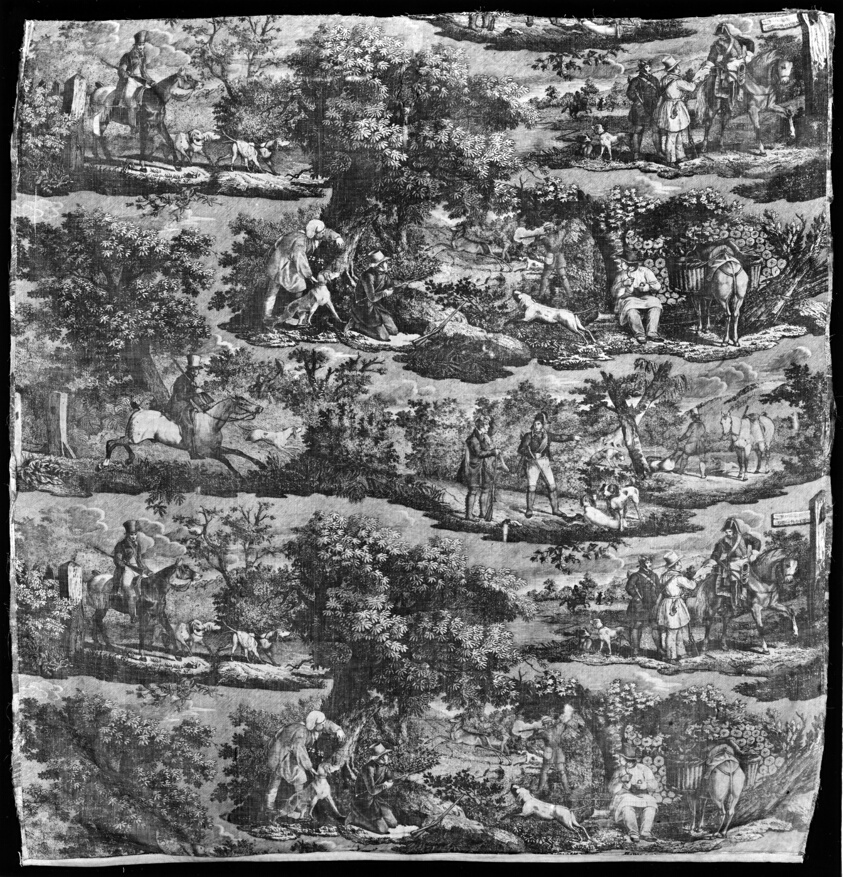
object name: Textile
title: La Chasse à Rouen (Hunting at Rouen) (Furnishing Fabric)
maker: Horace Vernet (French, 1789-1863); France, Rouen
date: 1840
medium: Cotton, plain weave; engraved roller printed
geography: Rouen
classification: textile; weaving - printed; furnishing textile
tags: dogs, animals